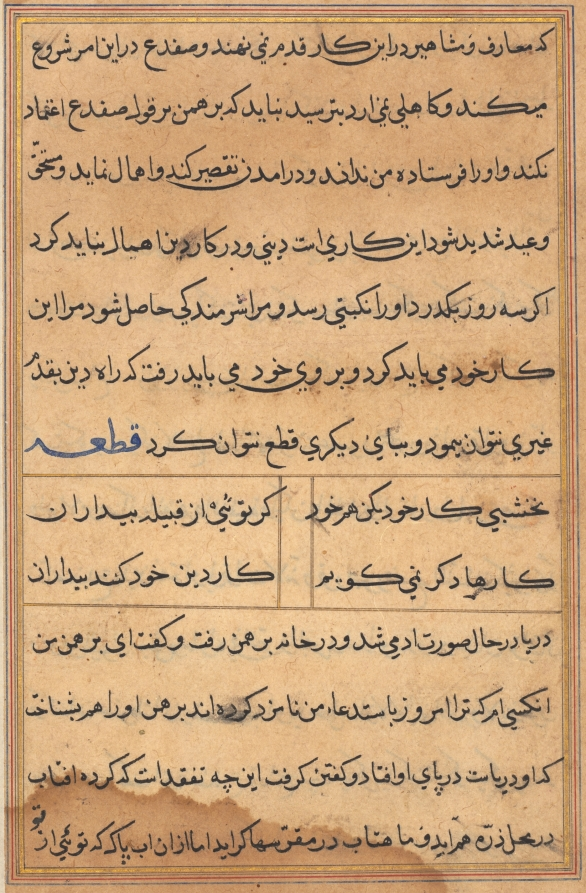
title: Page from Tales of a Parrot (Tuti-nama): text page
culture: Mughal India, court of Akbar (reigned 1556–1605)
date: c. 1560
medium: gum tempera, ink, and gold on paper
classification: Painting